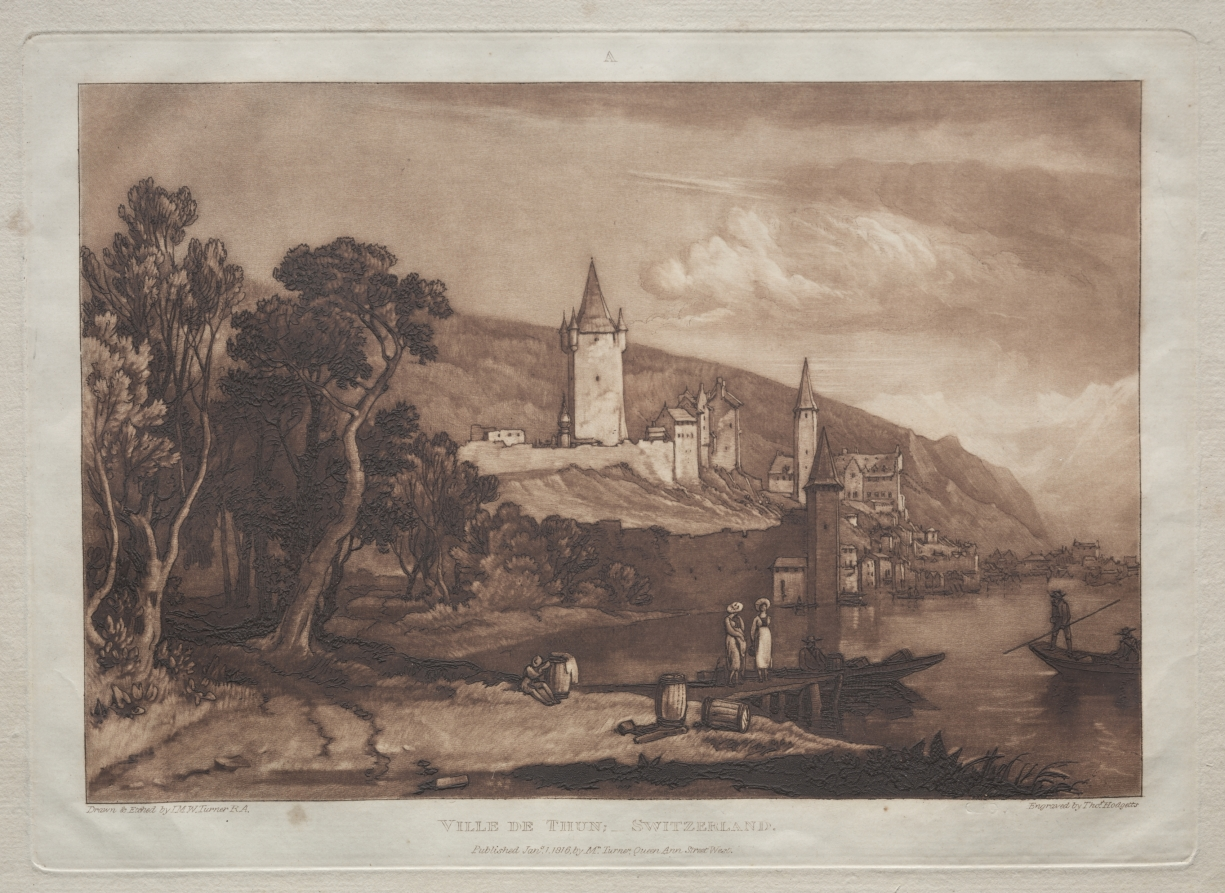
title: Ville de Thun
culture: England, 19th century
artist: Joseph Mallord William Turner (British, 1775–1851)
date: 1816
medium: etching and mezzotint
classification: Print